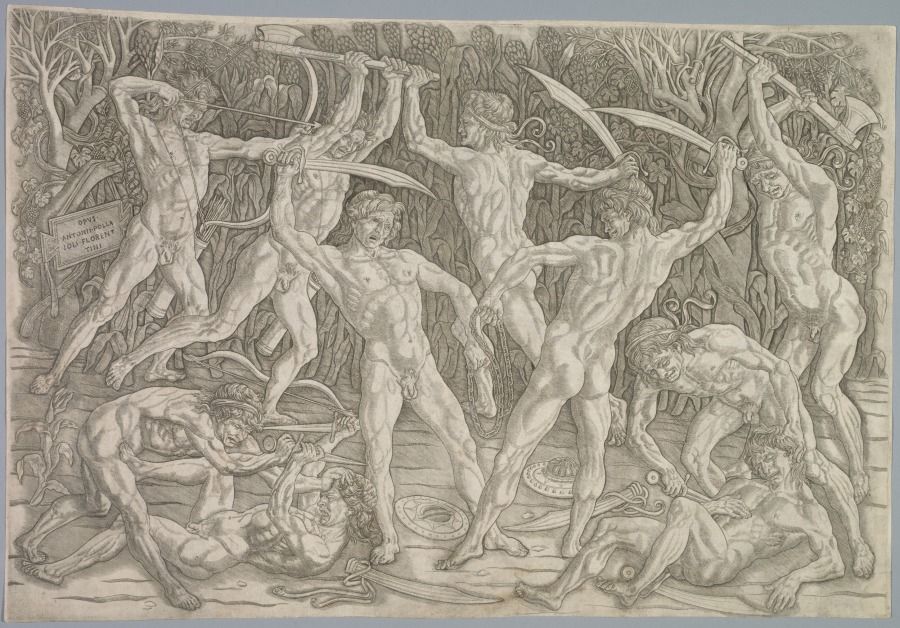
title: Battle of the Nudes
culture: Italy, 15th century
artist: Antonio del Pollaiuolo (Italian, 1431/32–1498)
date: 1470s–80s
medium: engraving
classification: Print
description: This engraving is one of the earliest Renaissance prints to portray the nude male body in action. Antonio del Pollaiuolo’s grimacing warriors appear like clones in different poses. The print may have functioned as a model for workshop apprentices studying human anatomy while learning to draw; however, the artist’s Latin signature suggests it also had an audience educated in literature. Art historians remain uncertain whether Pollaiuolo intended to depict a particular story or historical event. It is possible he created a deliberately ambiguous allegory that would appeal to patrons interested in interpreting symbols. For example, the continuous chain shared by the two central men could refer to an ancient idea that the body is the chain of the soul, only to be released in death.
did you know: Considered a groundbreaking work in the history of the Italian Renaissance, the CMA holds the only known impression of the print's first state.